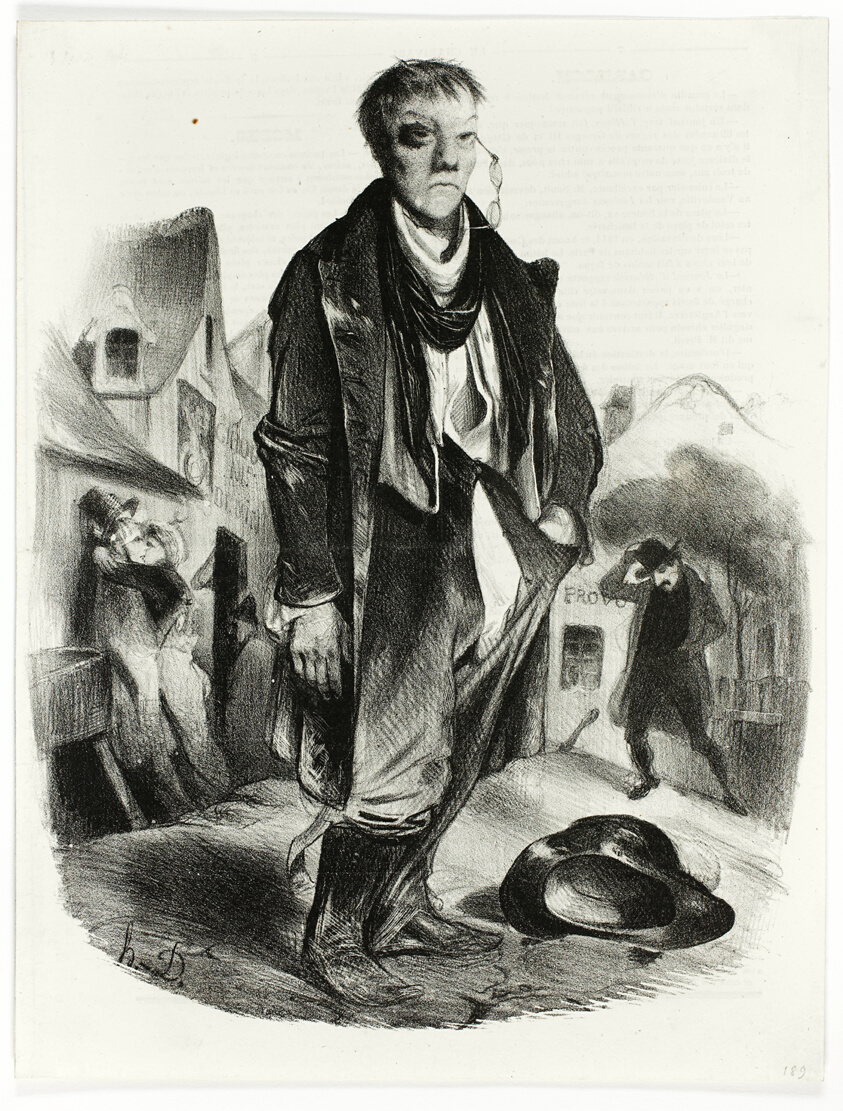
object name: Print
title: The Drunkard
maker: Honoré Daumier; French, 1808-1879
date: published, March 3, 1834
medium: Lithograph in black on ivory wove paper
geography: France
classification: lithograph; print; prints and drawing